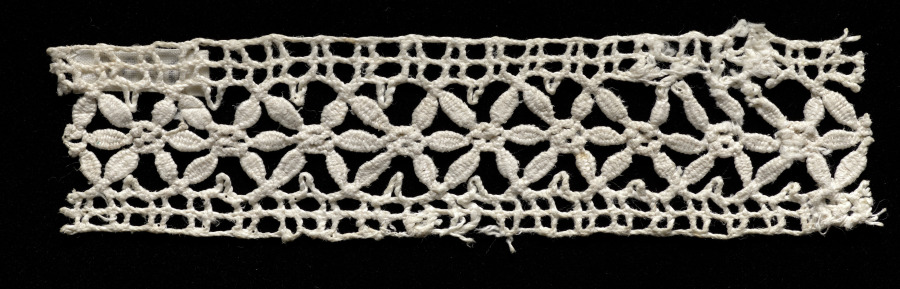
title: Lace Insertion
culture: Italy, Genoa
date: 1600s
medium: Bobbin lace (needle lace design)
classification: Lace